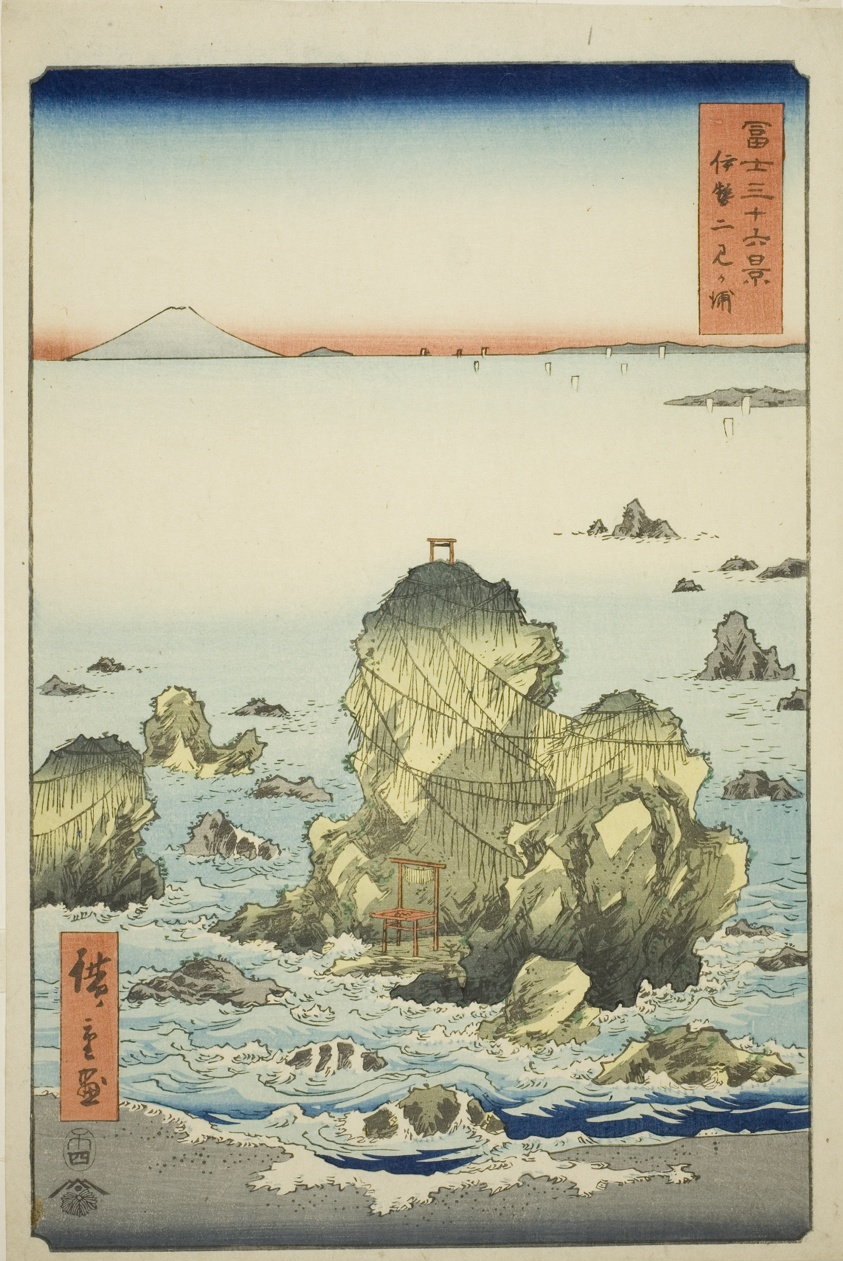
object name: Print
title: Futami Bay in Ise Province (Ise Futamigaura), from the series "Thirty-six Views of Mount Fuji (Fuji sanjurokkei)"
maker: Utagawa Hiroshige 歌川 広重; Japanese, 1797-1858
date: 1858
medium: Color woodblock print; oban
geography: Japan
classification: woodblock print; print; asian art